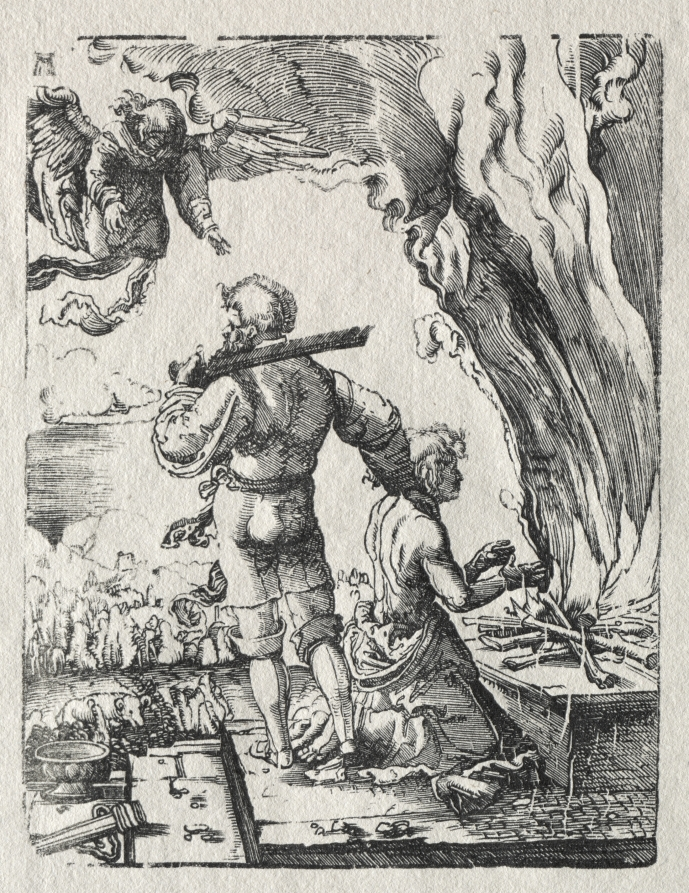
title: Abraham's Sacrifice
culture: Germany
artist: Albrecht Altdorfer (German, c. 1480–1538)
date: c. 1520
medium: woodcut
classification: Print